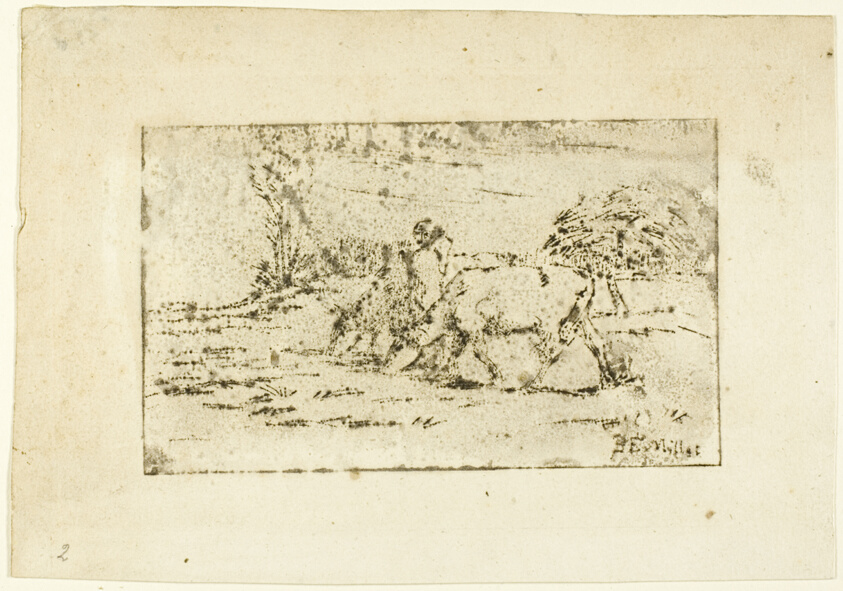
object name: Print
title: The Two Cows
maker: Jean François Millet (French, 1814-1875)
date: c. 1847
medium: Etching and drypoint on ivory wove paper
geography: France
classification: etching; print; prints and drawing